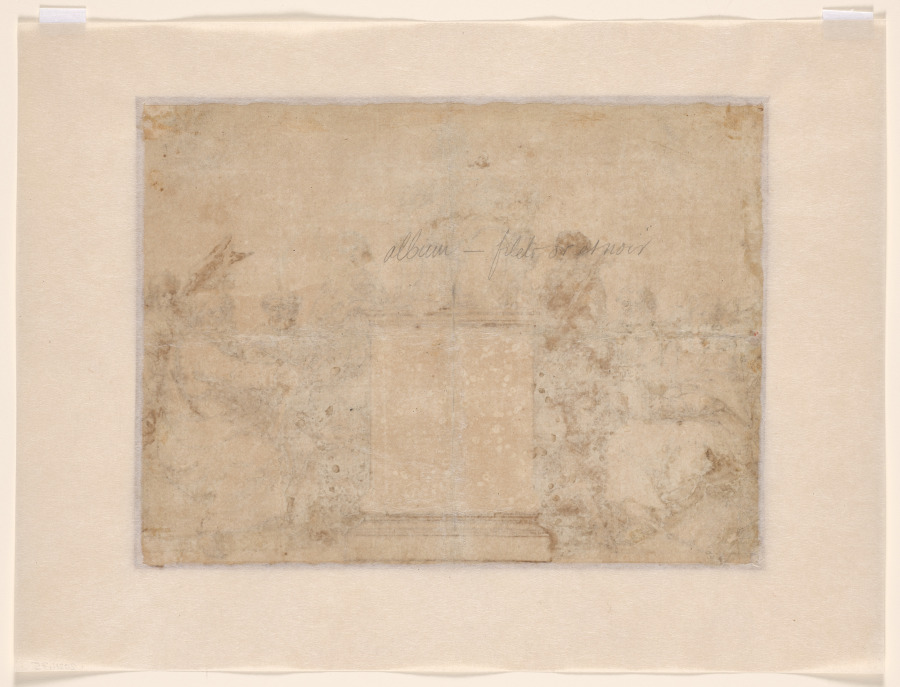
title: The Three Theological Virtures: Faith, Hope, and Charity, Surrounded by the Four Evangelists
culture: Netherlands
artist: Pieter I de Jode (Flemish, 1570–1634)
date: before 1634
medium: Pen and ink, brush and wash over chalk with indications of transfer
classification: Drawing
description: This drawing is a design for a frontispiece, or title page, for the 1639 edition of the Theatrum Biblicum, a pictorial Bible compiled from print series by various artists illustrating the Old and New Testaments. Pieter De Jode the Elder’s monumental figural types depict the three theological virtues: Charity, atop a blank plinth, Hope, on the right, and Faith, on the left, bordered by the four Apostles with their attributes. The plinth was kept blank in order to be filled in with the title of the book (in this case, the New Testament), in the printed version. De Jode spent his career making and publishing prints primarily for the Antwerp book trade, which flourished during the late 16th and 17th centuries.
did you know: In the period, the virtue of Charity, also described as Love, seen here seated atop the plinth, was usually portrayed as a woman tending to three children.